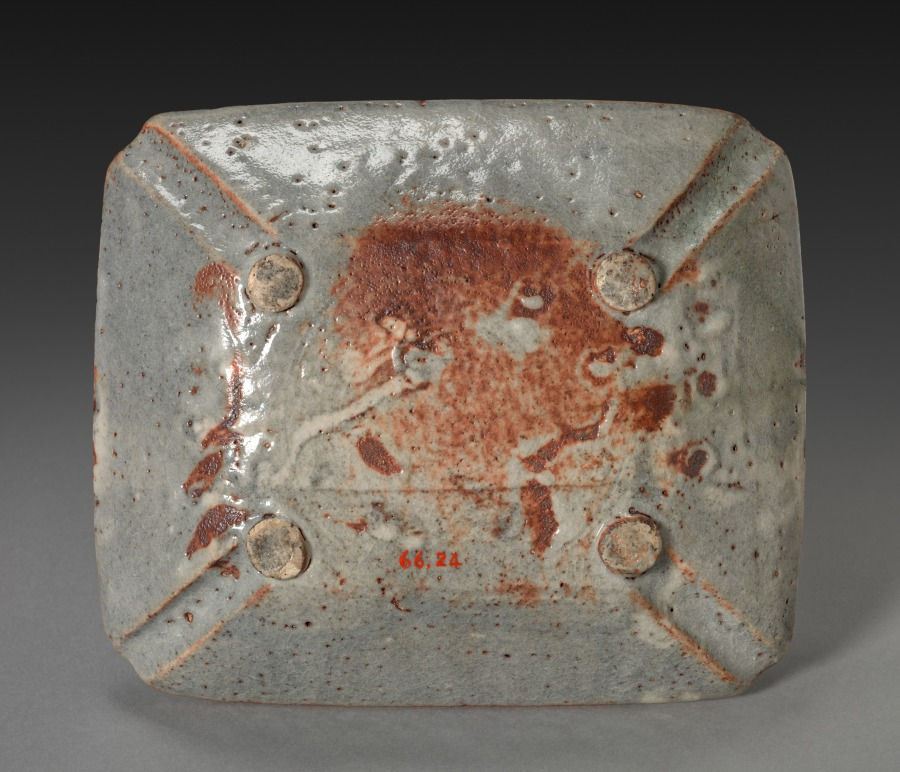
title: Dish with Autumn Grasses and Rocks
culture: Japan, Momoyama period (1573-1615) to Edo period (1615-1858)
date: late 1500s–early 1600s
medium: Stoneware with underglaze iron oxide slip and incised designs (Mino ware, Shino type)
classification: Ceramic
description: Mino ware is stoneware produced in the Mino area of present-day Gifu prefecture in central Japan. Works like this piece are called nezumi-shino, or “mouse-gray” Shino, after the glazing technique. The gray color and white design of grasses were achieved by applying an iron oxide slip to the surface and carving through it to the white clay, and then covering the whole surface in glaze and firing the object. In its design, this serving dish emulates Chinese ceramic prototypes, but its shape recalls wooden and lacquered trays commonly used in Japan at the time.